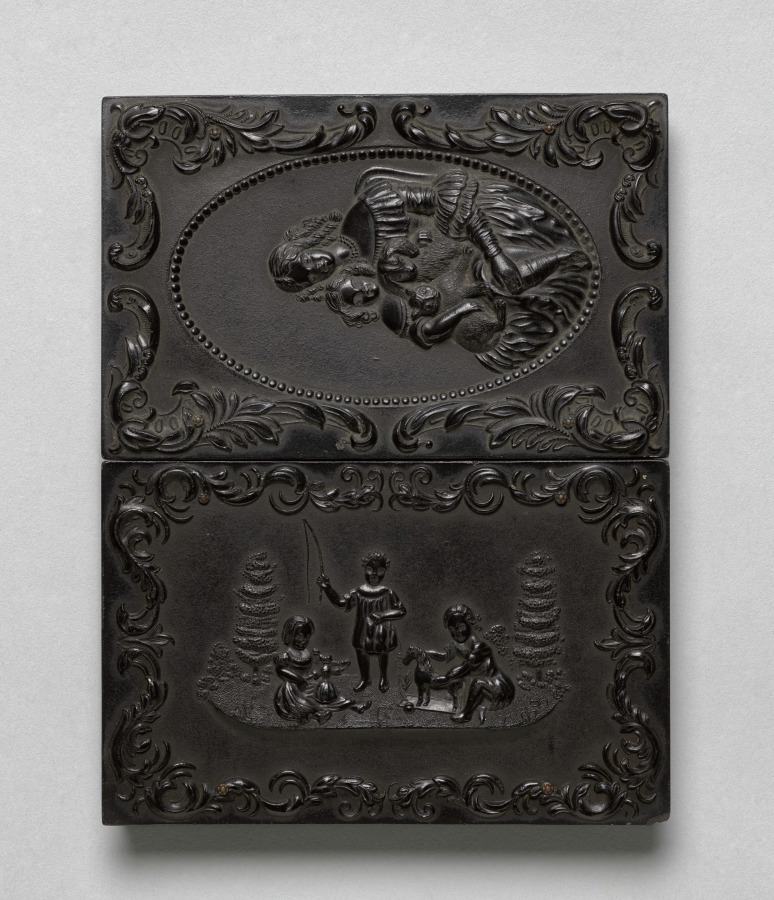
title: Husband and Wife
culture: America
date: c. 1860–65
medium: Two ambrotypes with hand-tinting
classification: Photograph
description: You rarely see a smiling portrait from the mid-19th century. Having your photograph taken was a serious and rare endeavor, plus it was difficult to hold any animated expression long enough for the exposure times required by the early processes. Sitters were instructed to find ways to keep from moving, such as clasping their hands. The woman here has taken the photographers’ cautions to an extreme, resulting in a tense and unflattering portrait.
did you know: In the early decades of photography, many people did not know how to pose for the camera.